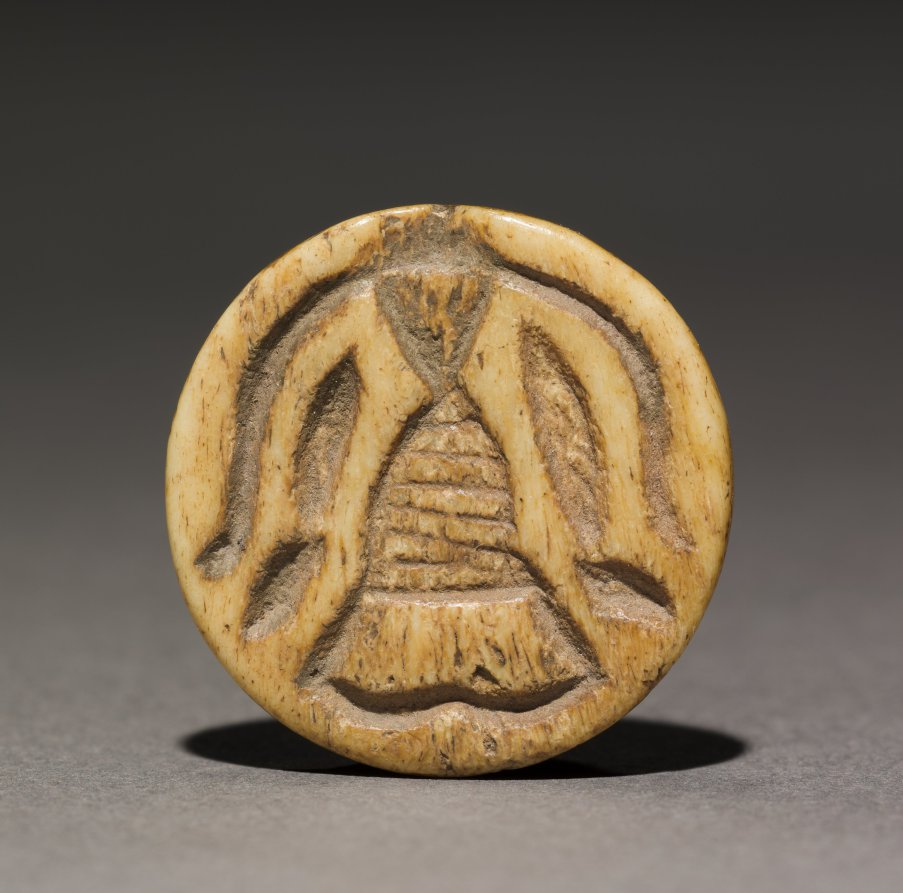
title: Seal Amulet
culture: Egypt, Old Kingdom (2647–2124 BCE), Dynasties 5–6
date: 2300–2124 BCE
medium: bone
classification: Amulets